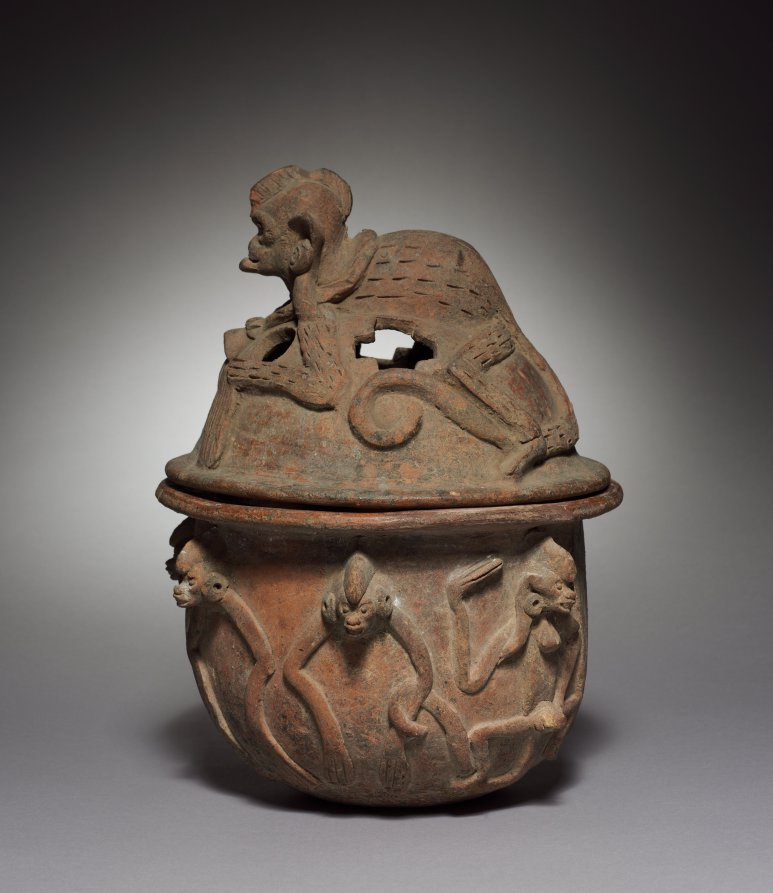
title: Incense Burner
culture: Guatemala, Quiché, San Juan Cotzal, Maya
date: 600–1000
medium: pottery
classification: Ceramic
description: According to the Popol Vuh, a sixteenth-century Quiché Maya manuscript, the world has been created and destroyed twice, and we now live in the third creation. In the second creation, human beings were made from wood and reeds. They lacked souls and minds, and they did not revere their creator. Because of these imperfections, most were killed by an uprising of utensils and domestic animals. Monkeys are the descendents of the survivors.